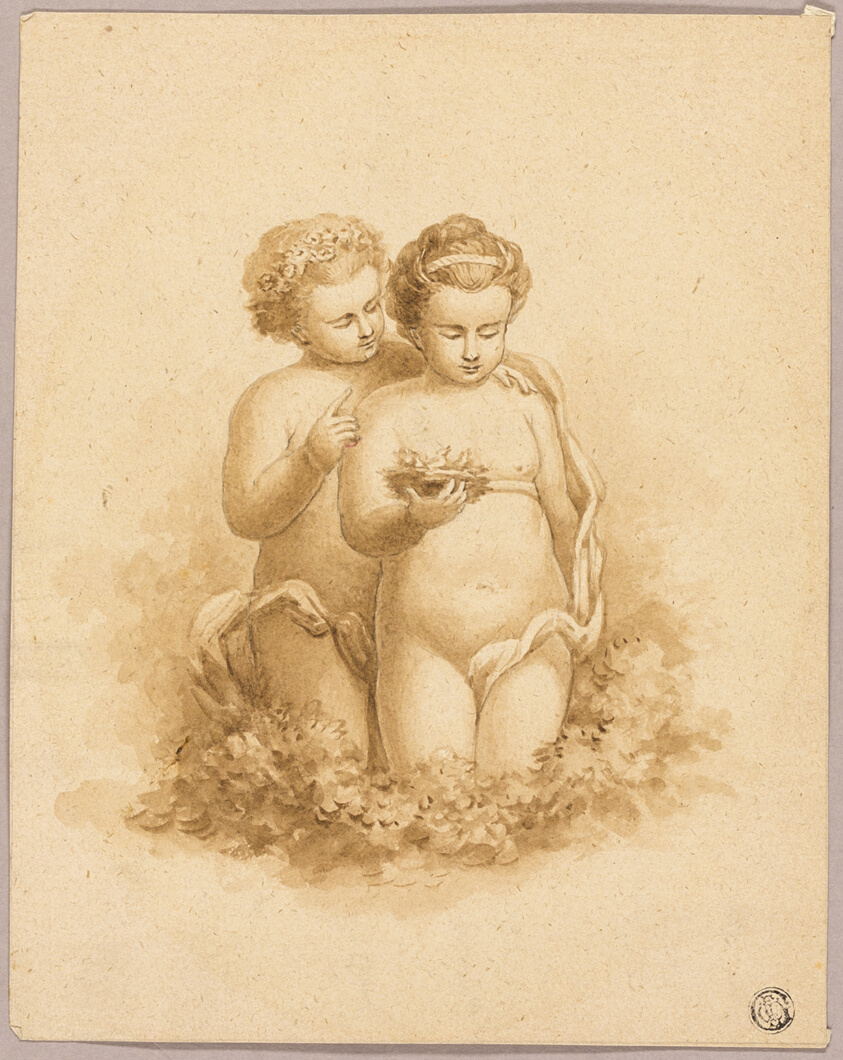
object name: Drawing and Watercolor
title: Two Children, One Holding Nest with Birds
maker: Unknown artist; European, 1800-1899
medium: Brush and brown wash, with graphite, on tan wove paper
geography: France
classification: brush and wash; paper; drawings (visual works); prints and drawing